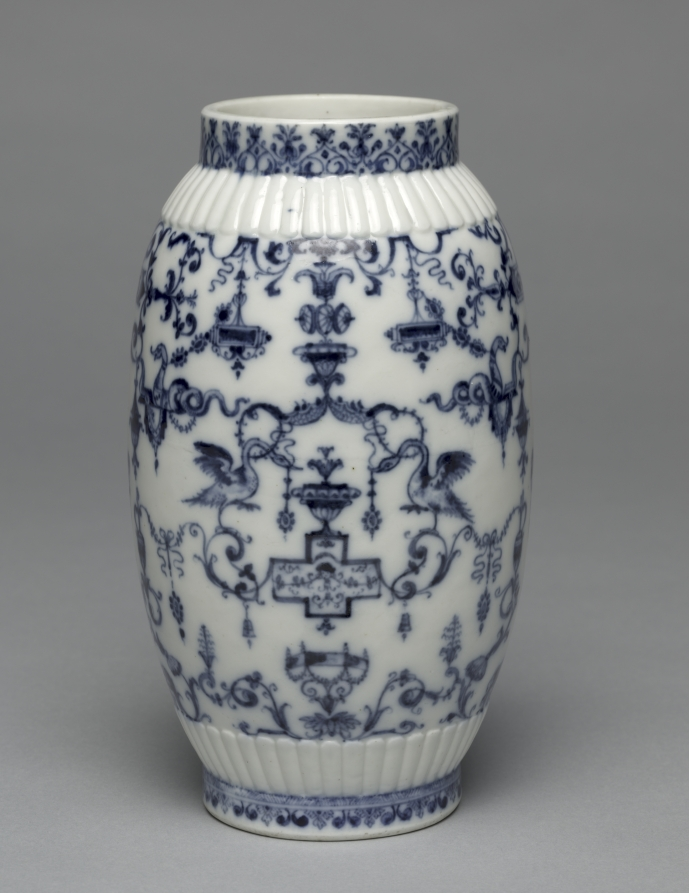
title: Vase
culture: France, St. Cloud, late 17th-early 18th Century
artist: attributed to Saint Cloud Porcelain Factory (French)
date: c. 1695–1700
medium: Molded soft-paste porcelain with blue underglaze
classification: Ceramic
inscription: "55"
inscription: "KR paiz"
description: This vase’s decoration demonstrates the converging influence of Chinese and Italian art on French porcelain manufacture. Early production at the Saint-Cloud factory was inspired by blue and white Chinese porcelain. Books of grotesque designs popular during the Italian Renaissance and published by Jacques Androuet Du Cerceau provided models for this vase’s ornament including its interlacing garlands, swans, and snakes.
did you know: This vase may have been part of a garniture, a decorative set of matching porcelain intended to be displayed together.